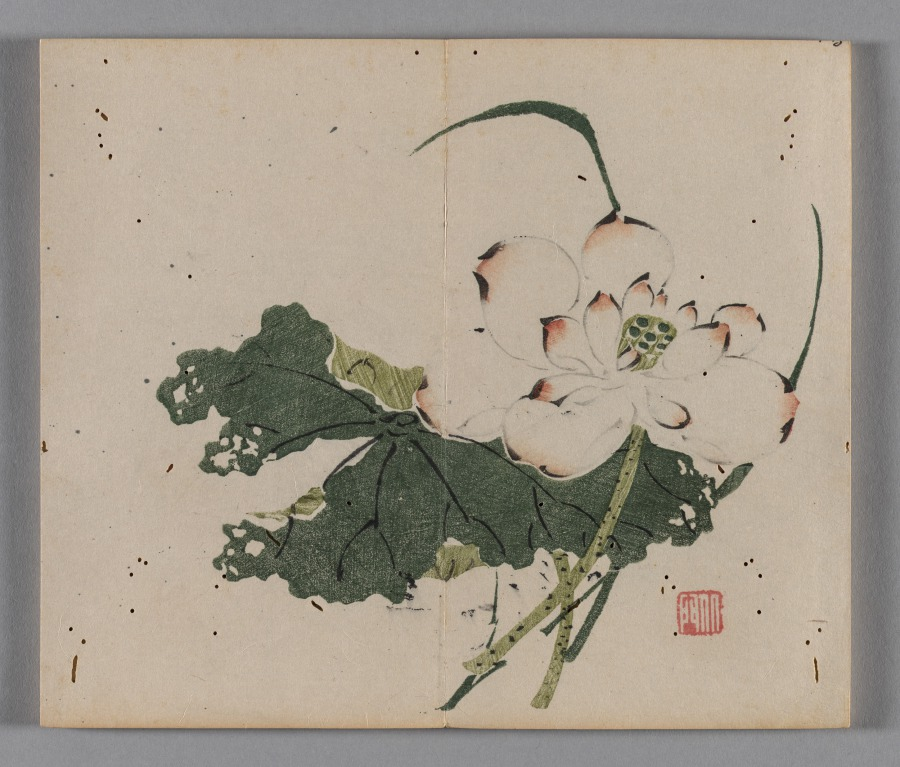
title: Ten Bamboo Studio Painting and Calligraphy Handbook (Shizhuzhai shuhua pu): Miscellaneous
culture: China, Qing dynasty (1644-1911)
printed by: Hu Zhengyan (Chinese, c. 1584–1674)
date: 1633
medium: Woodblock-printed book; ink and colors on paper; first edition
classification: Print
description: Color printing reached a level of perfection in the early 1600s, as seen in this Ten Bamboo Studio Collection of Calligraphy and Painting and the Mustard Seed Garden Manual of Painting (printed 1679 and 1701). The painterly quality, precision in registering (aligning) the woodblocks, and harmonious colors made them the most successful color print editions in Chinese history. Both editions were printed and compiled in Nanjing, spread nationwide, and had a great impact on the arts in Japan and Korea.